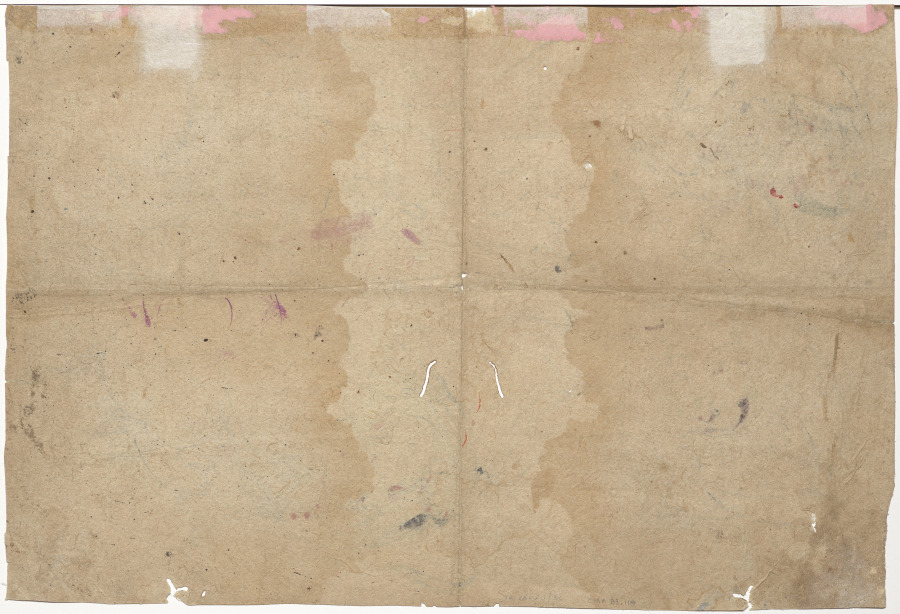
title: Studies of a Lion Killing Prey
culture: India, Kotah school, c. 19th century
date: c. 1800s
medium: ink on paper; drawing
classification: Drawing